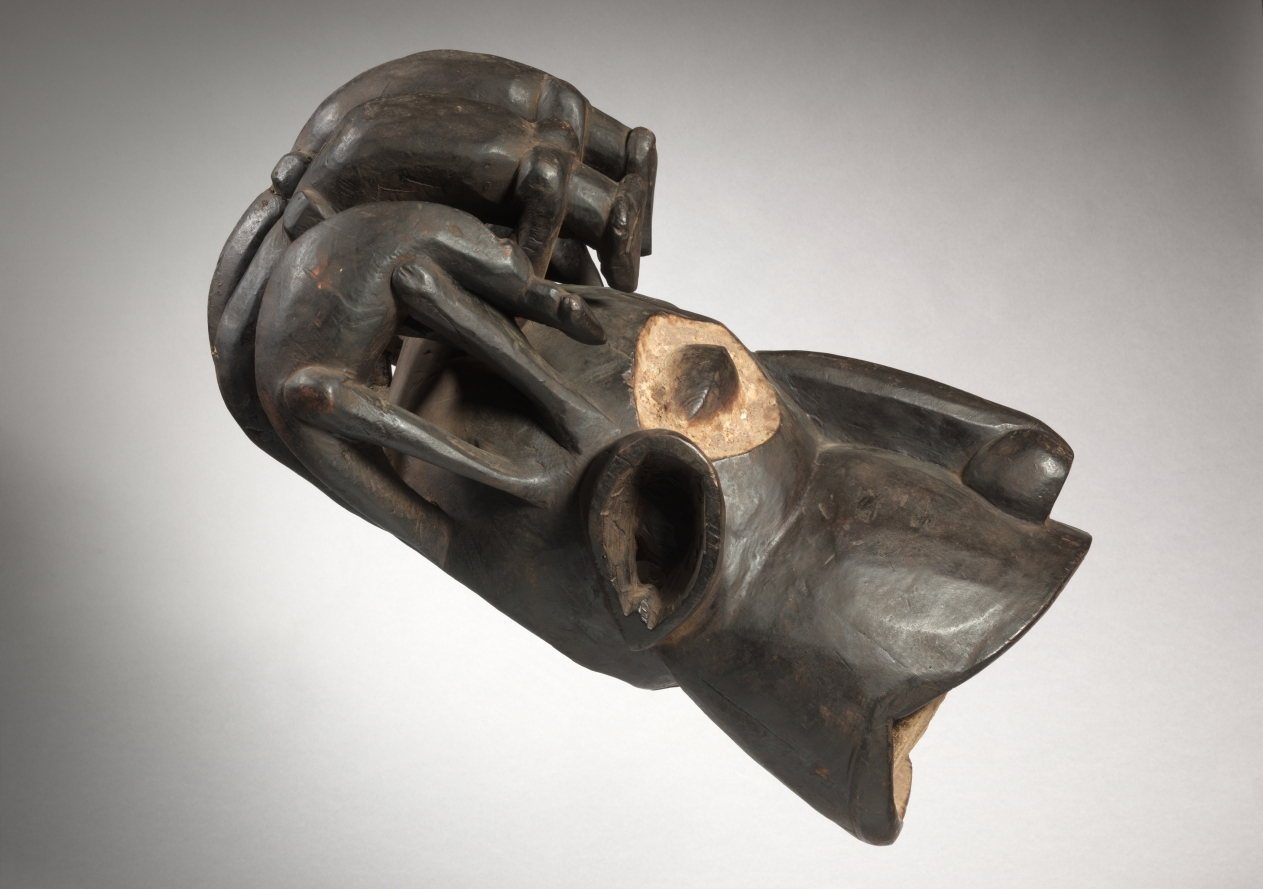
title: Helmet Mask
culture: Africa, Central Africa, Cameroon, possibly Kom-style maker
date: early 1900s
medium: Wood, paint, organic material, and iron alloy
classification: Mask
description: Deliberately distorted and exaggerated facial features reflect the awesome powers of a great chief. The quadrupeds on the mask’s head suggest the close association between the leopard and the king. In the Cameroon grasslands, masks are typically related to a regulatory society that guards ancestral mores; society members wear the masks and dance in the secrecy of the night.